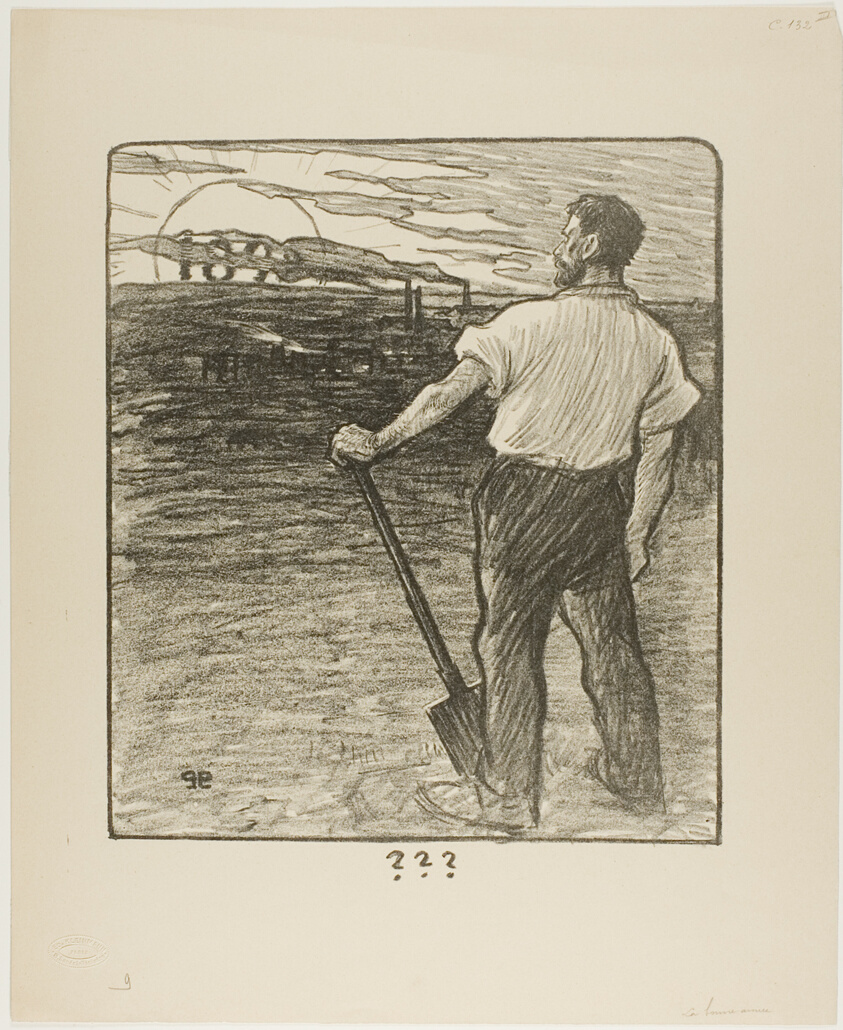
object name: Print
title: Happy New Year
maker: Théophile-Alexandre Steinlen; French, born Switzerland, 1859-1923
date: December 1893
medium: Lithograph in black on cream wove paper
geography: France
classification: lithograph; print; prints and drawing